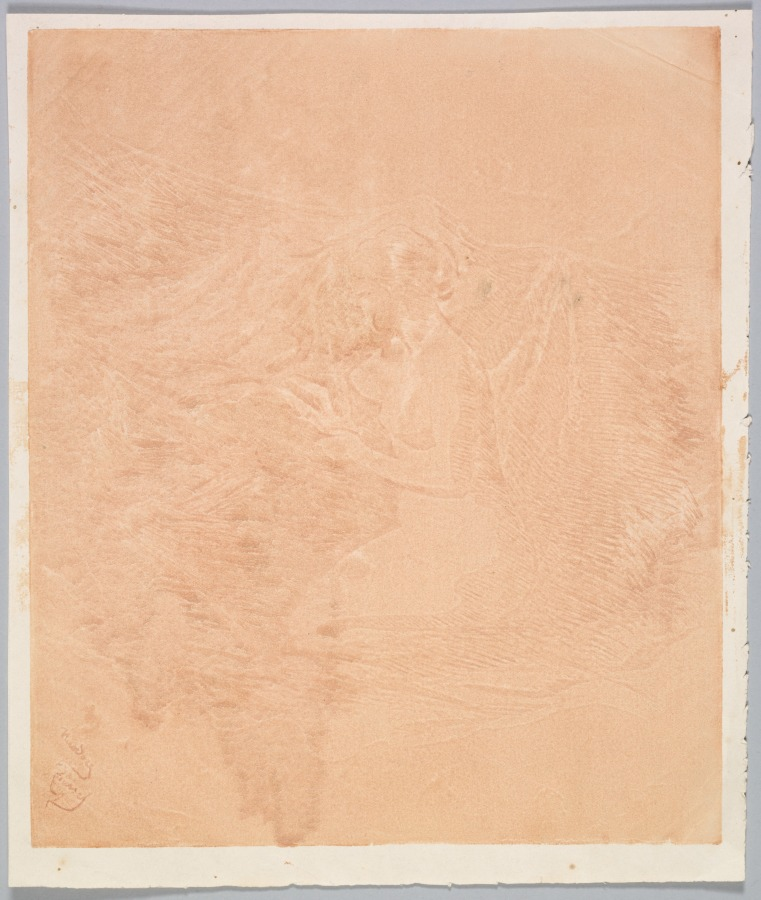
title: Embers Glow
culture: France, 19th century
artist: Theodore Roussel (French, 1847–1926)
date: 1890–1897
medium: color etching and aquatint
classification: Print